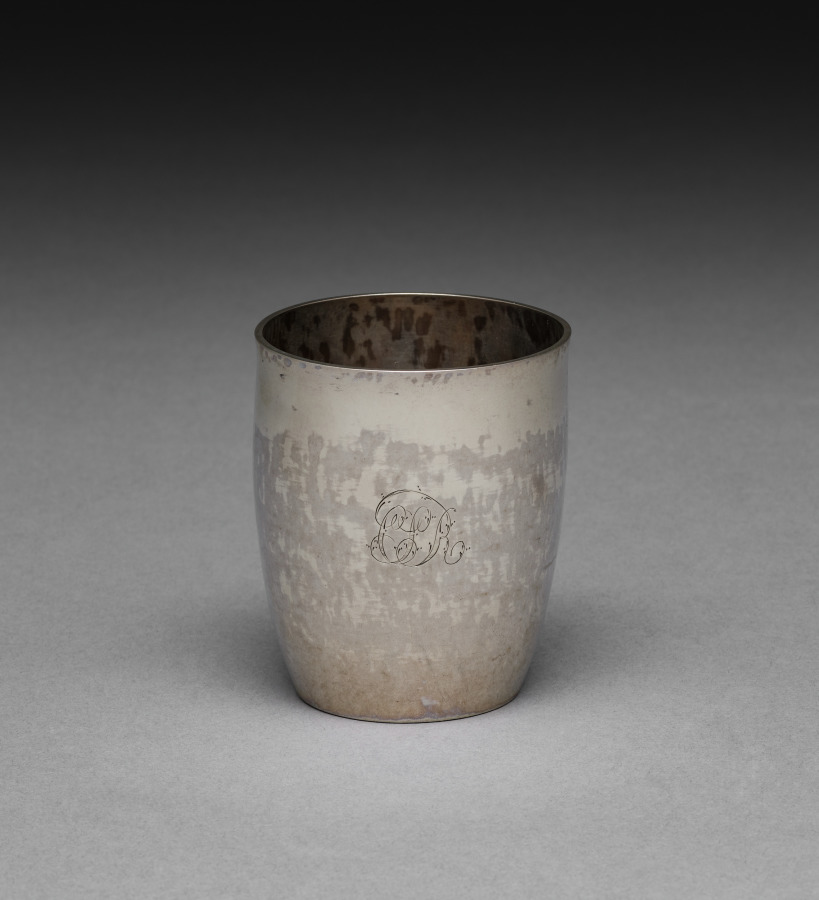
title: Beaker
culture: America, Massachusetts, Boston, 19th century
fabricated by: Thomas Knox Emery (American, 1781–1815)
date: 1805–1815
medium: silver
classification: Silver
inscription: engraved "CSR" in bright-cut script on body.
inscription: Stamped underside: "T.K.E."